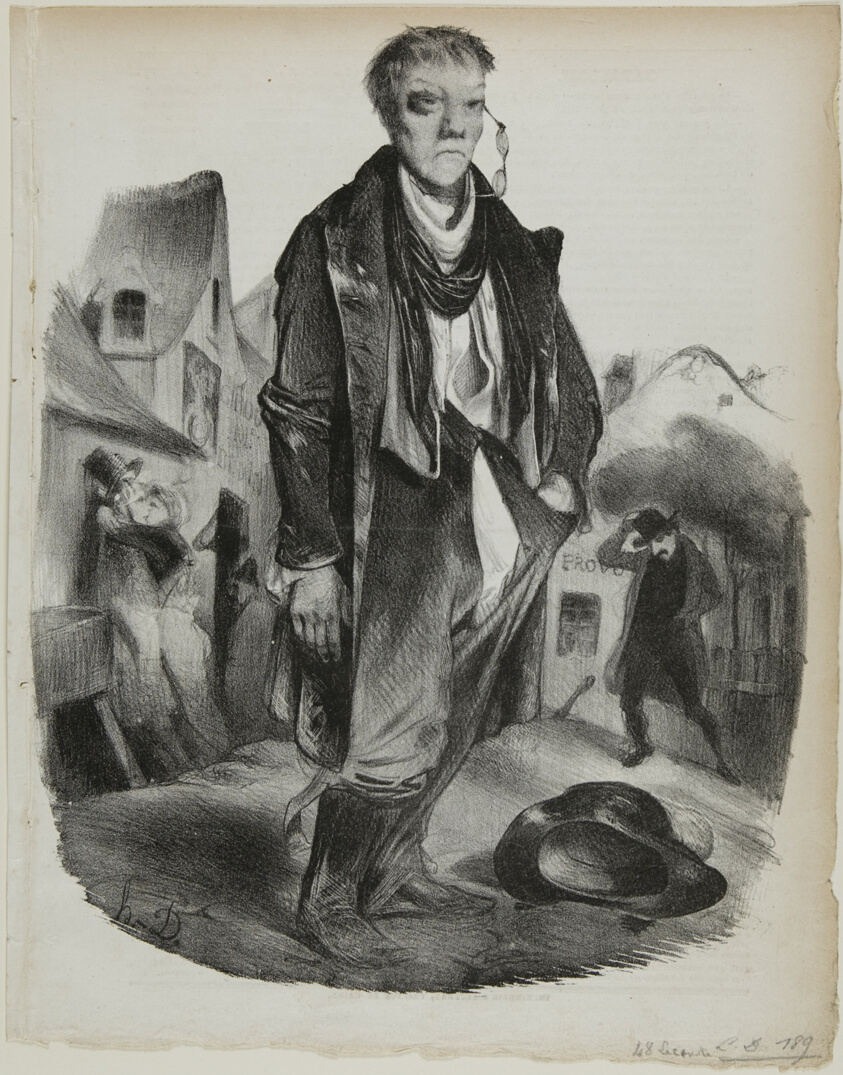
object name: Print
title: The Drunkard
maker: Honoré Victorin Daumier; French, 1808-1879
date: 1834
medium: Lithograph in black on ivory wove paper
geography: France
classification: lithograph; print; prints and drawing